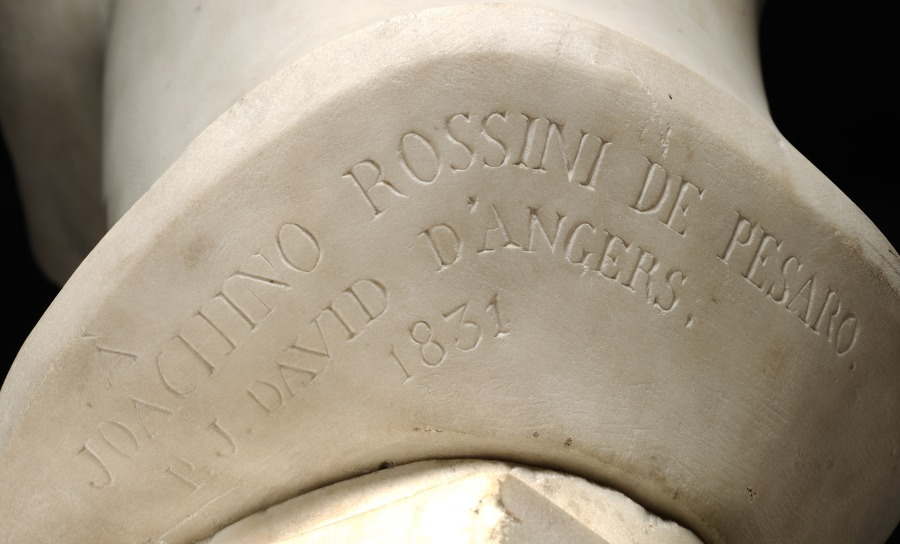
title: Bust of Rossini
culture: France, 19th century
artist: Pierre Jean David d'Angers (French, 1788–1856)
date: 1831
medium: marble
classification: Sculpture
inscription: inscribed at back of neck: A / Joachino Rossini de Pesaro / P.J. David d'Angers / 1831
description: Gioacchino Antonio Rossini (1792–1868) was a composer most famous for his comic operas. Although of Italian birth, much of Rossini's later life was spent in Paris, where he undoubtedly sat for this portrait for David d'Angers, whose ambition it was to sculpt portraits of all the famous people of his day.